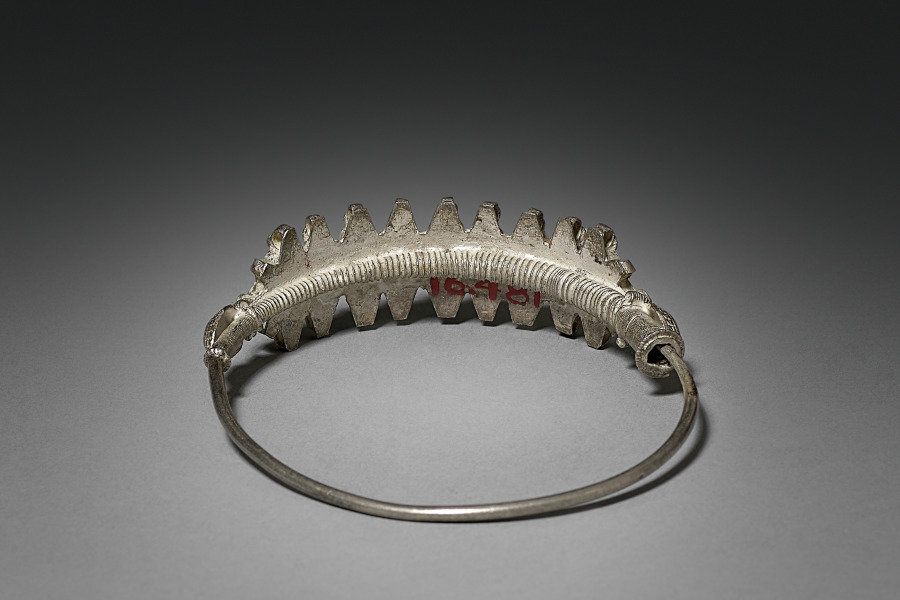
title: Nose Ring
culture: India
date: early 1900s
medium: silver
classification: Jewelry